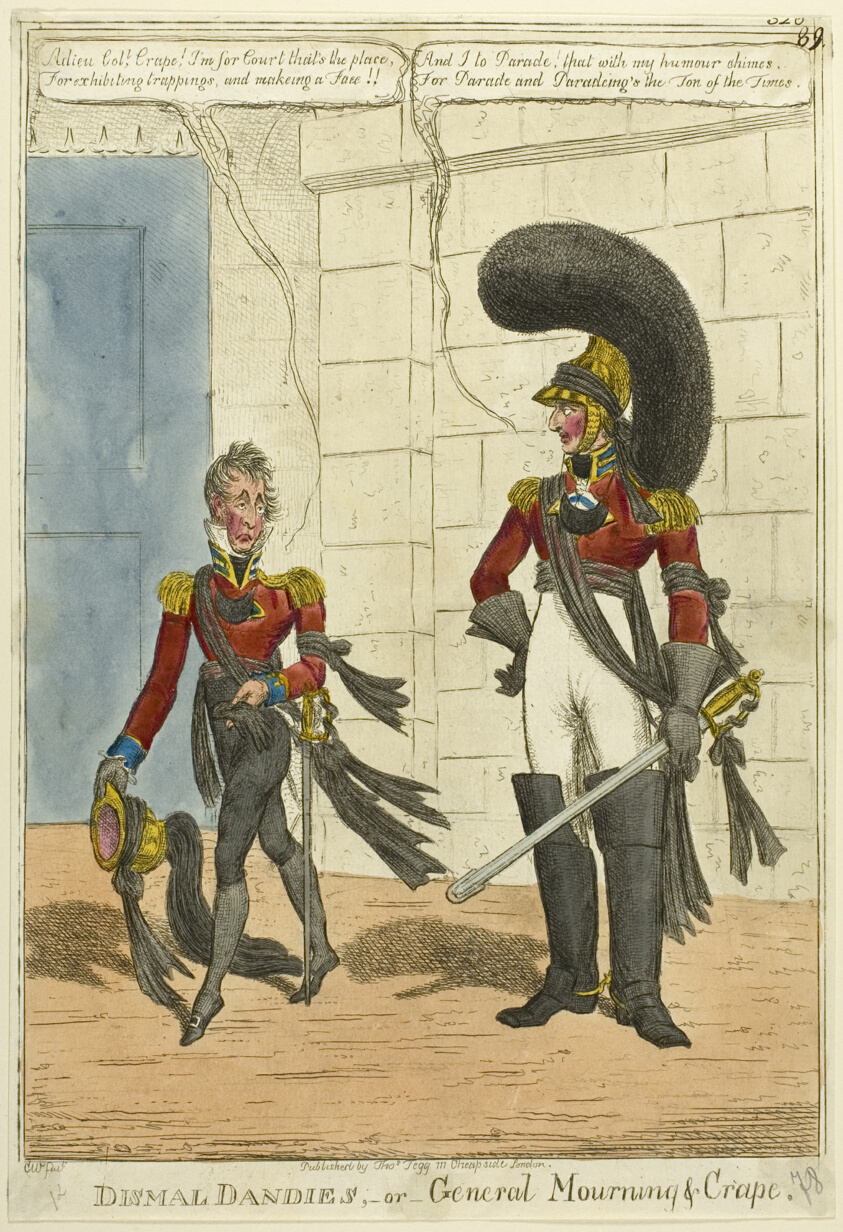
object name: Print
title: Dismal Dandies, or General Mourning & Crape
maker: Charles Williams (English, active 1797-1830); published by Thomas Tegg (English, 1776-1845)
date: c. 1819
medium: Etching and engraving in black, with hand-colored additions, on cream wove paper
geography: England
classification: etching; print; prints and drawing